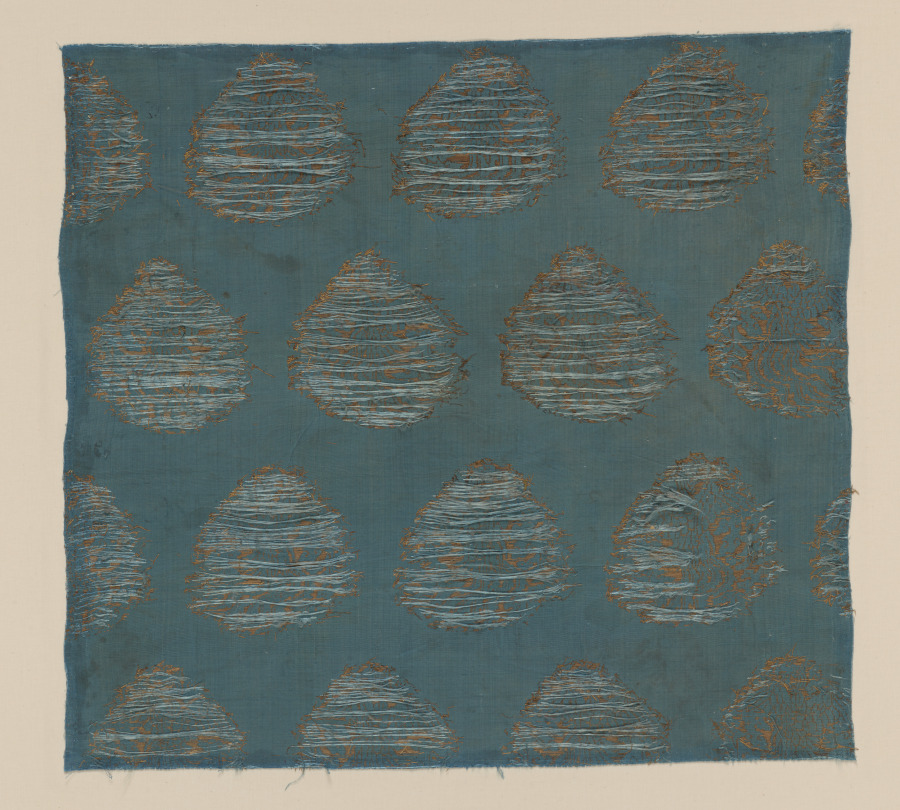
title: Brocade with Soaring Phoenixes among Clouds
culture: China, Jin dynasty (1115–1234)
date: 1100s–1200s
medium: Silk and gold thread; tabby, brocaded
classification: Textile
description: The gold-brocaded designs of Jin brocades, such as this example with graceful phoenixes soaring into clouds, are typically asymmetrical. Moreover, they have no frame or border, and appear to have been cut out of larger decorative images.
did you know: Textiles like this, which were probably exported from China to Iran, helped transmit the phoenix motif into Ilkhanid decorative arts.